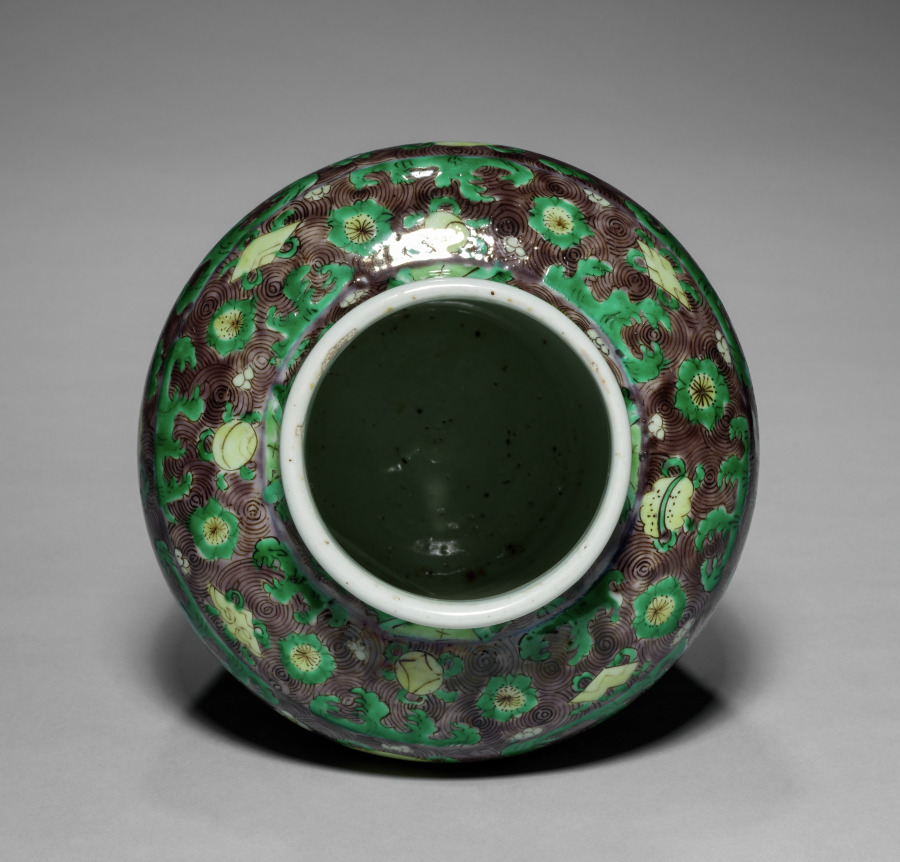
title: Baluster Jar and Cover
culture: China, Jiangxi province, Jingdezhen kilns, Ming dynasty (1368–1644) or Qing dynasty (1644–1911)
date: 1600–1650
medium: Porcelain with wucai (five-color) enamels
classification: Ceramic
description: The central motif on this jar is a mountain emerging from the sea, symbolizing Mount Sumeru in Buddhist cosmology, and representing the central axis in the universe in Daoism. White cherry blossoms floating on the wavy ground are surrounded by auspicious symbols such as the coin for wealth and the lozenge for victory. The yellow knob on the jar’s cover depicts a cherry blossom. Other fortuitous motifs—such as the leaf of protection, the pearl to grant wishes, the stone chime for celebration, rocks symbolizing longevity—also decorate the lid. While most jars have lost their covers over time, this jar retains its original lid.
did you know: The waves are depicted in a rich aubergine, or purple, glaze.